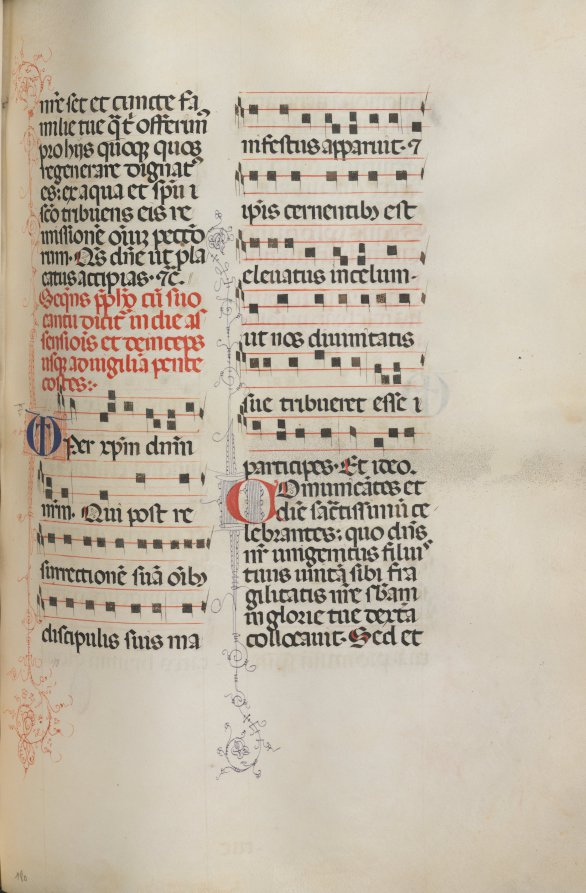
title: Missale: Fol. 180: Music for various ordinary prayers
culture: Italy, Perugia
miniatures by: Bartolommeo Caporali (Italian, c. 1420–1503)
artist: assisted by Giapeco Caporali (Italian, d. 1478)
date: 1469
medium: ink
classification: Bound Volume